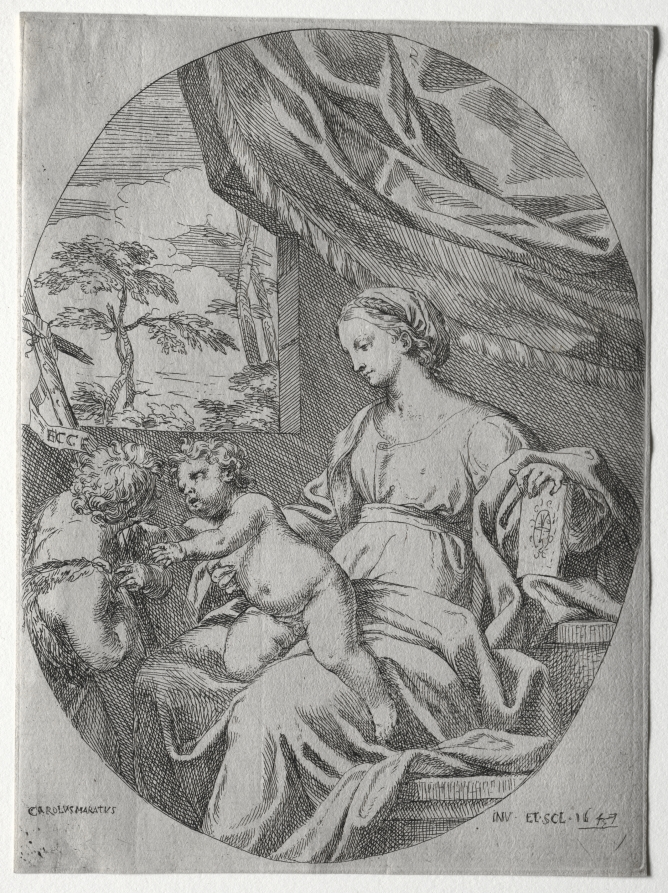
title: Virgin and Child with the Infant St. John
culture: Italy, 17th century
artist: Carlo Maratti (Italian, 1625–1713)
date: 1647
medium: etching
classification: Print